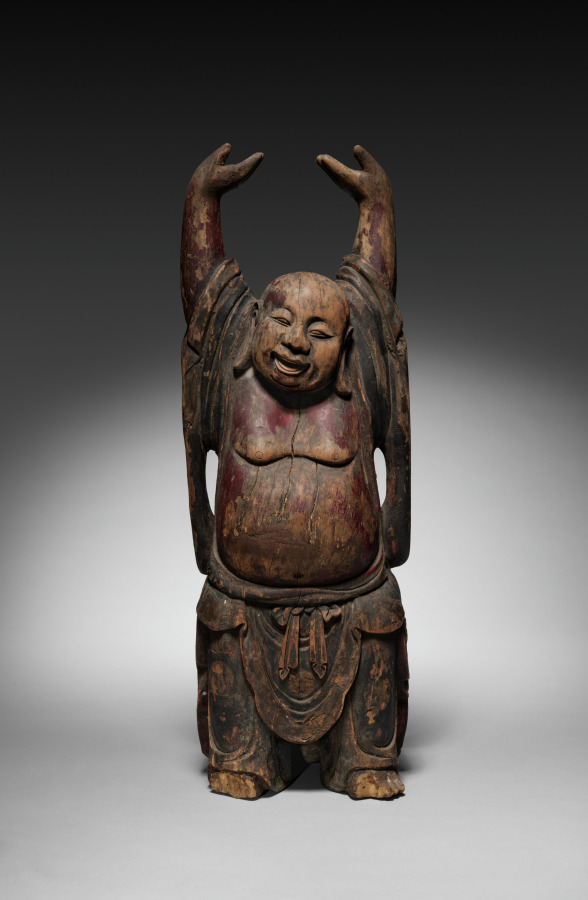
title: The Monk Budai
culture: China, Ming dynasty (1368–1644)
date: 1400s–1500s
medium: wood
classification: Sculpture